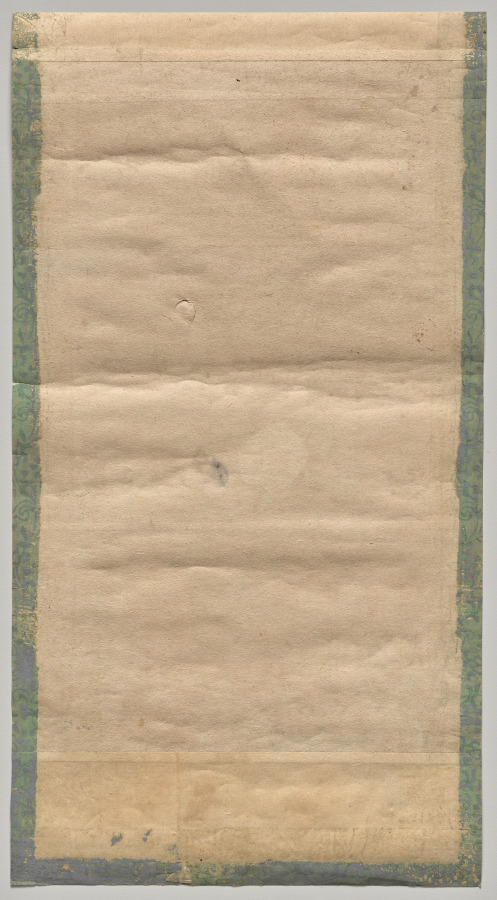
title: Zhang Xian Shoots the Heavenly Dog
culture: China, Qing dynasty (1644–1911), Daoguang reign (1821–50)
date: 1821–50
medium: Polychrome woodblock print; ink and color on paper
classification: Print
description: In the 1600s, printing flourished in such Jiangnan cities as Nanjing, Suzhou, Hangzhou, and Huizhou, evolving from privately enjoyed illustrated books printed in color to more commercialized single-sheet color prints that were hung on walls and became part of the rich urban visual culture.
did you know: Woodblock printing in color reached a height in China in the 1600s to 1700s. The prints were executed by means of sets of separate blocks, each carved to print a different color.